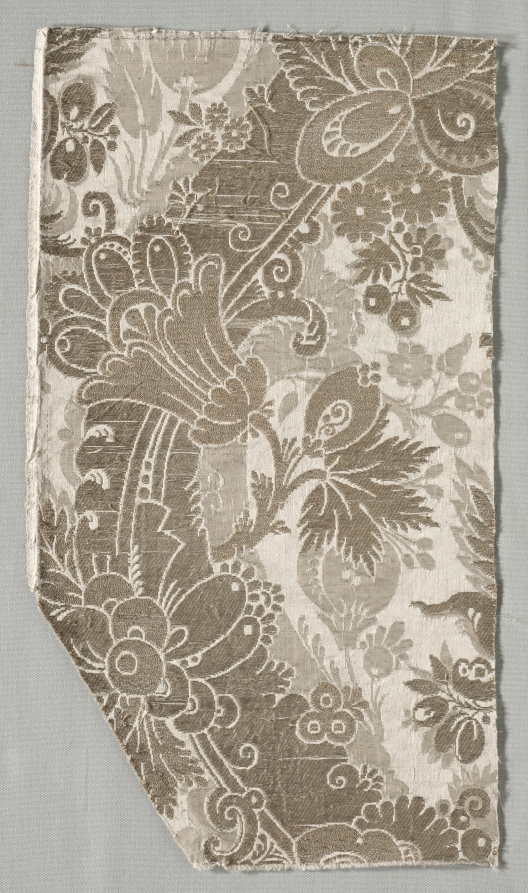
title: Textile Fragment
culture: Italy, 18th century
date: 1700s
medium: brocade (?); silk and metal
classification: Textile